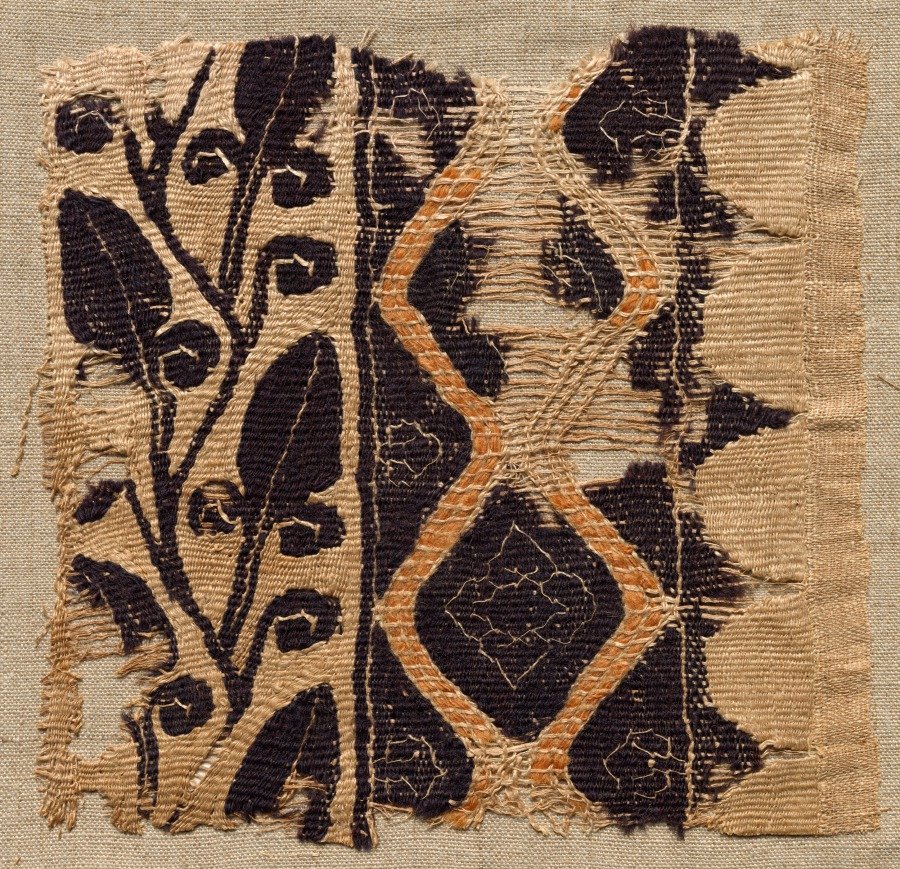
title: Fragment of a Large Cloth, Perhaps a Pallium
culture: Egypt, Byzantine period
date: 400s - 500s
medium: tabby weave, inwoven tapestry ornament; wool and linen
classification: Textile